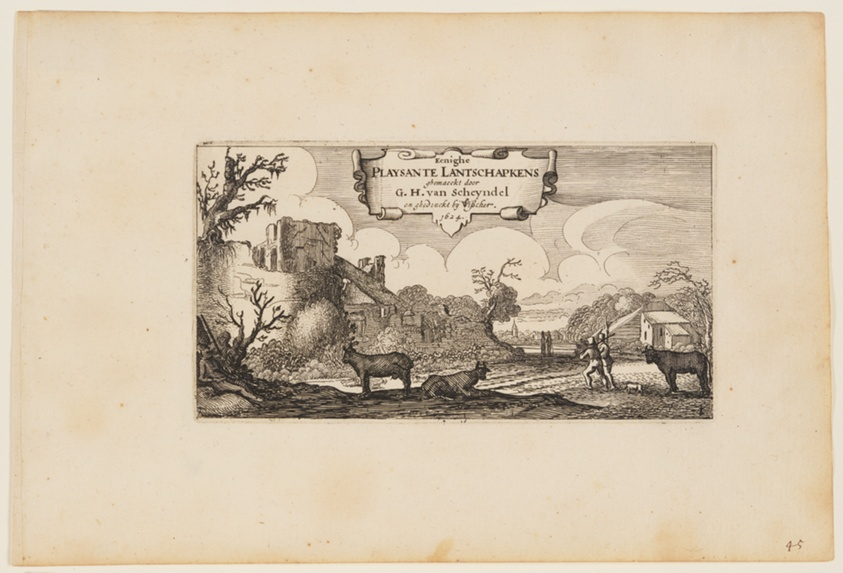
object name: Print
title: Title Page, from Twelve landscapes with Figures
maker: After Gillis van Scheyndel; Dutch, 1595–1660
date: 1624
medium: Etching on ivory laid paper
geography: Netherlands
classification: etching; paper; print; prints and drawing